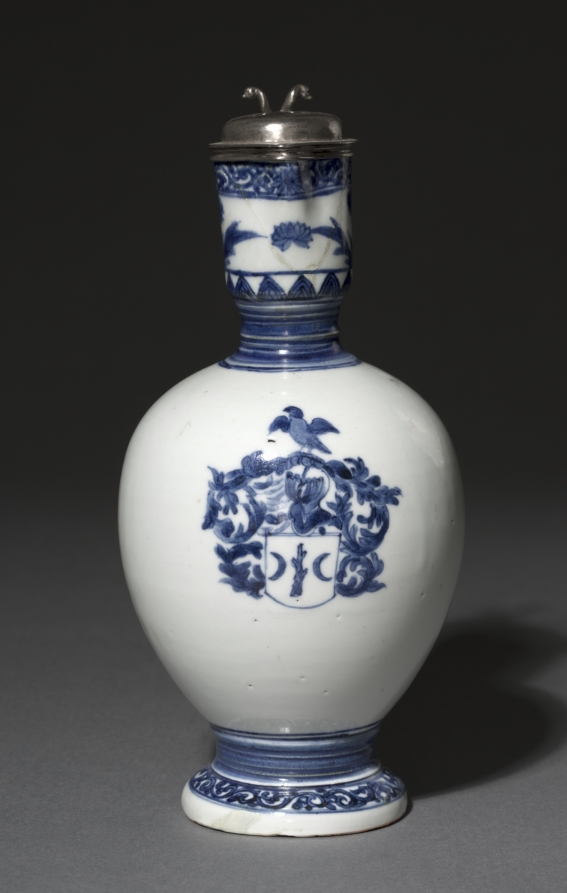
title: Jug with Silver Mounts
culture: Japan, Edo period (1615–1868)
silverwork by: Barent van Leeuwen (Dutch, 1637–1682)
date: c. 1662–76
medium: Porcelain with underglaze blue decoration; silver mounts (Hizen ware, Arita type)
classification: Ceramic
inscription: [on silver]: town mark for Amsterdam; lion rampant crowned (alloy mark for 0-934 silver); d (date letter for 1666), maker's mark of Barent van Leeuwen.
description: The coat of arms on this jug are those of the Valckenier family, active in the Dutch East India Company.